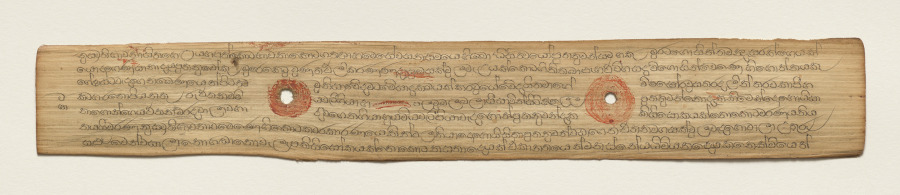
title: Leaf from a Buddhist Manuscript (recto)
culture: Sri Lanka, Singhalese, Late 17th century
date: c. 1700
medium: fiber paper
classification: Manuscript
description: Palm leaf material is still used for manuscripts in Sri Lanka. The palm leaves are prepared first by boiling them, drying them in the sun, and then rubbing them with oils. Scribes then use a metal stylus to incise the text. Then charcoal powder is wiped across the pages, filling in only the inscribed lines.